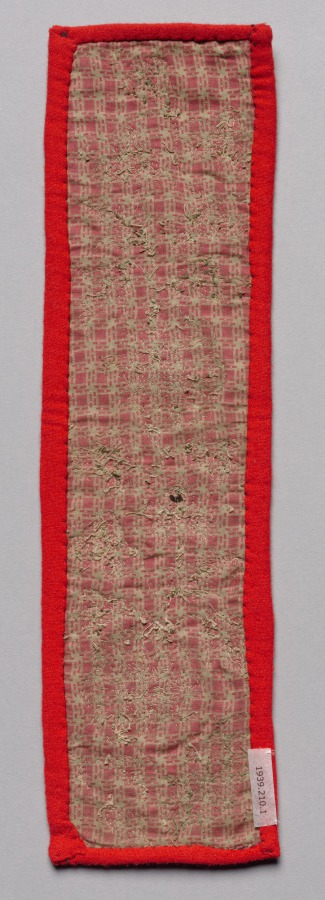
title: Beaded Panel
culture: Northeast Woodlands, Great Lakes Region, Anishinaabe (Ojibwe) or Nehiyawak (Cree) People?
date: late 1800s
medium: glass beads on wool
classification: Textile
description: In the 1800s, native peoples began to use European fabrics to fashion fine formal garments; they favored sturdy cloth, such as velvet and wool broadcloth, which provided support for heavy decorative beadwork that was added by hand. Often the fabric was a dark color, providing dramatic contrast for the multicolored beads. Rather than encrusting the entire garment, beadwork was confined to cuffs, “epaulettes,” bib-like plackets and yokes, rectangular panels sewn to leggings, shirts, and dresses, and the like.